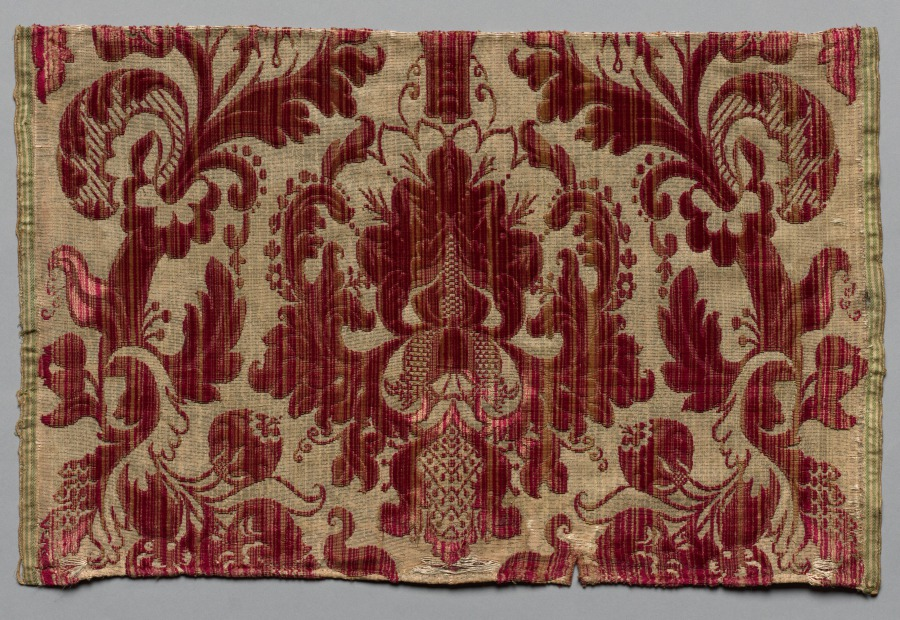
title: Fragment of Velvet Brocade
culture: Italy ?, late 17th or early 18th century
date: late 1600s or early 1700s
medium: brocaded silk velvet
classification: Velvet